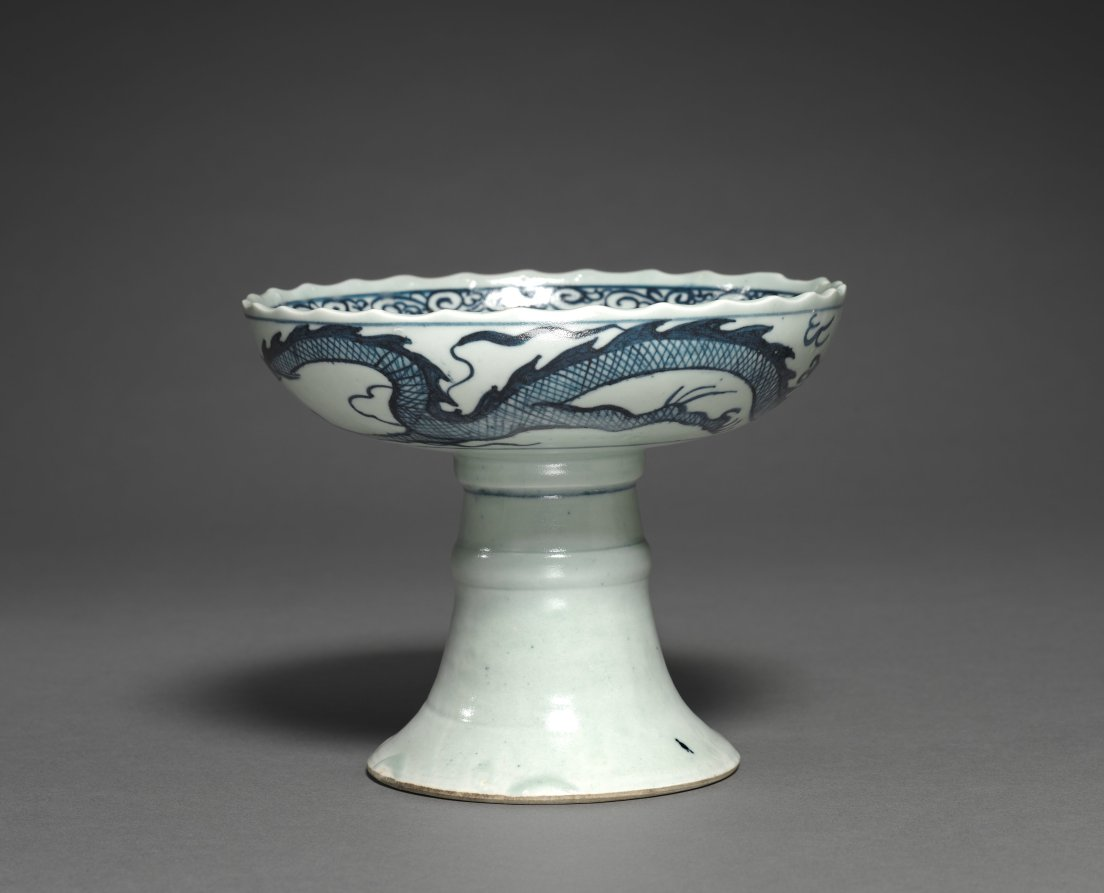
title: Stem Cup with Dragon Decoration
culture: Vietnam (Annam)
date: 1300s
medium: porcelain with underglaze blue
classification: Ceramic